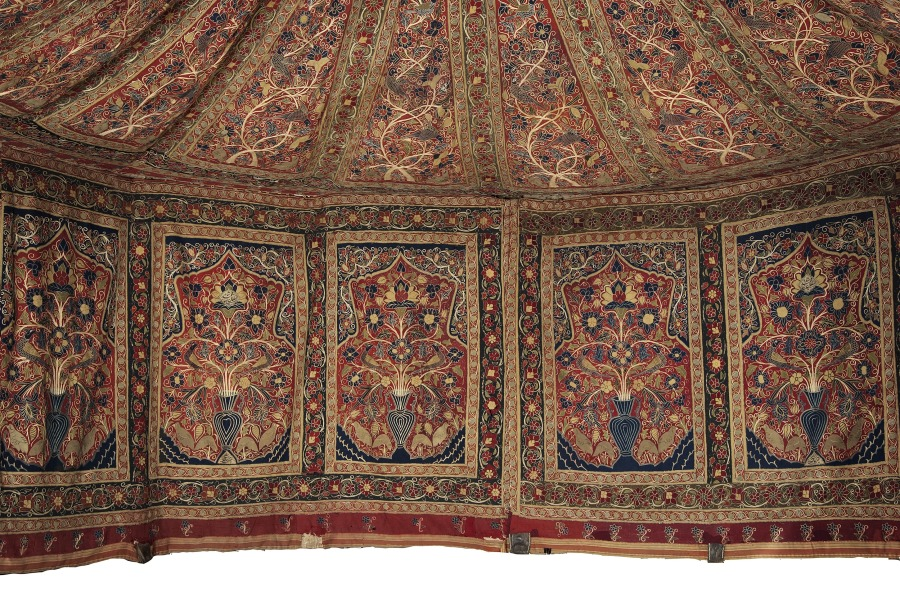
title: Royal Round Tent Made for Muhammad Shah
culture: Iran, Rasht, Qajar period (1779-1925)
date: 1834–48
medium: Interior: wool: plain weave, inlaid work; silk: embroidery, chain stitch; tape, leather; Exterior: cotton, wool: plain weave; rope, iron ring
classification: Textile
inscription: Inscriptions: The central design unit of panel 2014.388.2 and 2014.388.4 has two embroidered inscriptions. 1. Upper inscription (center of the top blossom): "Muhammad shah sultan-e ghazi."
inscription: 2. Lower inscription (on the base of the vase): "Kamtarin bandeh-ye dargah fath'ali."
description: Royal tents were potent symbols of authority, wealth, and power throughout the greater Middle East. Rulers owned thousands of tents. They were used for shelter, shade, and innumerable functions in tent compounds that were essential for imperial ceremonies, travel, and military campaigns. Distinguished by size with elaborately decorated interior walls and ceilings, tents could be as large as castles. Opulent tents were also presented as imperial gifts. Tents are only known through documents before 1600. For example, in Baghdad in 809, Caliph Harun al-Rashid owned 4,000 ceremonial tents and 150,000 camping tents that were stored in the imperial Abbasid treasury. An astonishing variety and quantity of tents were housed in the royal Fatimid tent storeroom in Cairo in 1068–69, including "military tents, fortress tents, and castle tents, manufactured of . . . gold-brocaded stuff embroidered with designs of elephants, wild beasts, horses, peacocks, birds." Since 1600, Ottoman Turkish tents with elaborate floral decoration have been preserved in Istanbul in the Topkapi Palace Museum and Military Museum, and in European collections as war booty, primarily from the Ottoman Turks' attempt to conquer Vienna in 1683. These tents are not done in the Rasht technique, but rather are appliqué. In contrast, royal tents from Iran are extremely rare. This spectacular ceremonial tent is embroidered with the name of its owner, Muhammad Shah, who ruled Iran from 1834 to 1848 during the Qajar dynasty. The radiant jewellike interior features exuberant flora, blossoming vines, and robust birds made with colored wool embellished with silk-thread embroidery.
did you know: Rasht work is named after the city on the Caspian Sea in present-day Iran, which was a major silk trade center with numerous textile workshops.